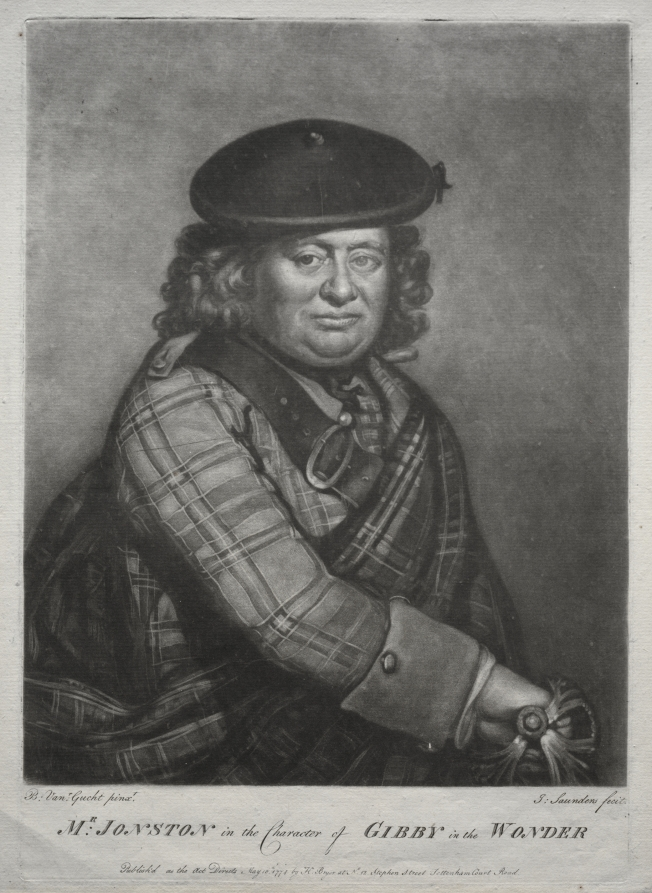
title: Alexander Jonston in the character of Gibby in "The Wonder"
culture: England, 18th century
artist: Joseph I Saunders (British)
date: 1774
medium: mezzotint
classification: Print